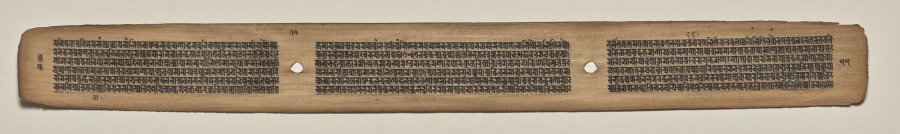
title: Text, Folio 77 (verso), from a Manuscript of the Perfection of Wisdom in Eight Thousand Lines (Ashtasahasrika Prajnaparamita-sutra)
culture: Eastern India, Bihar, Vikramashila Monastery. Painting: Nepal, Kathmandu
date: Sunday, September 14, 1119 (year 239 of the Newar Samvat in the month of Ashvina)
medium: gum tempera and ink on palm leaves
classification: Painting